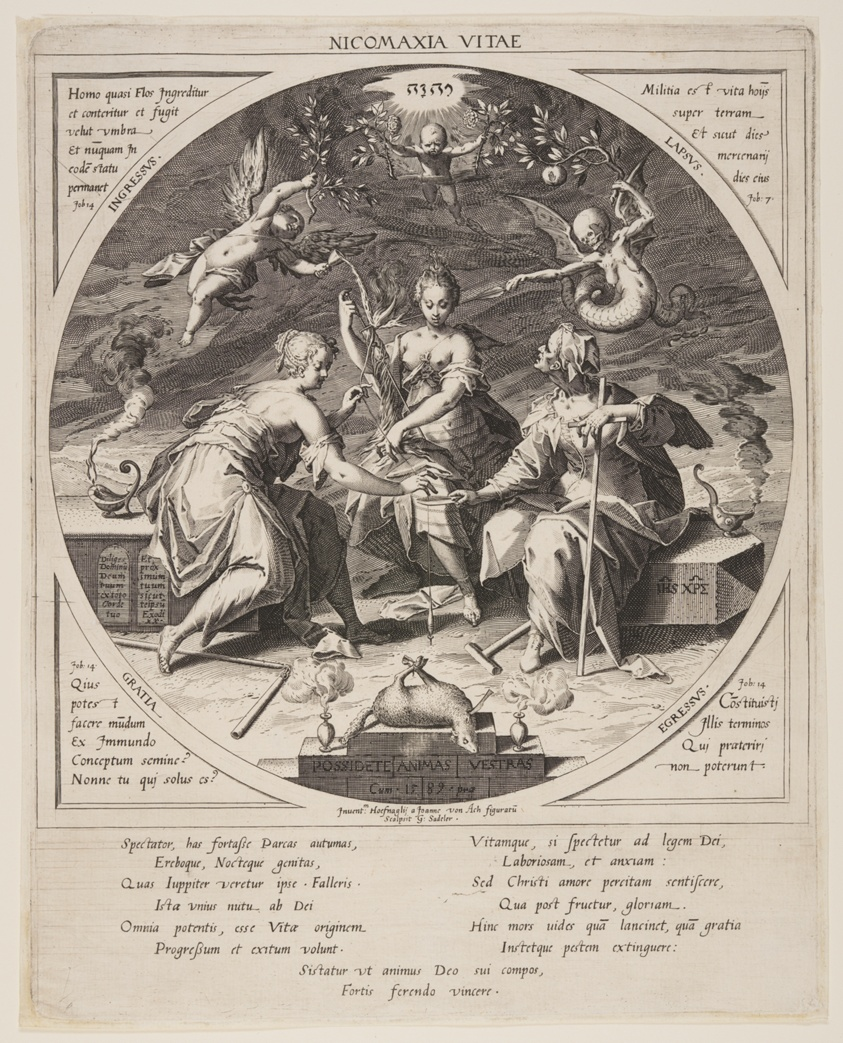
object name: Print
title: The Three Fates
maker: Aegidius Sadeler II (Flemish, c. 1570–1629); after Joris Hoefnagel (Flemish, 1542-1601) and Hans von Aachen (German, 1552-1616)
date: 1589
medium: Engraving on ivory laid paper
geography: Flanders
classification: engraving; paper; print; prints and drawing